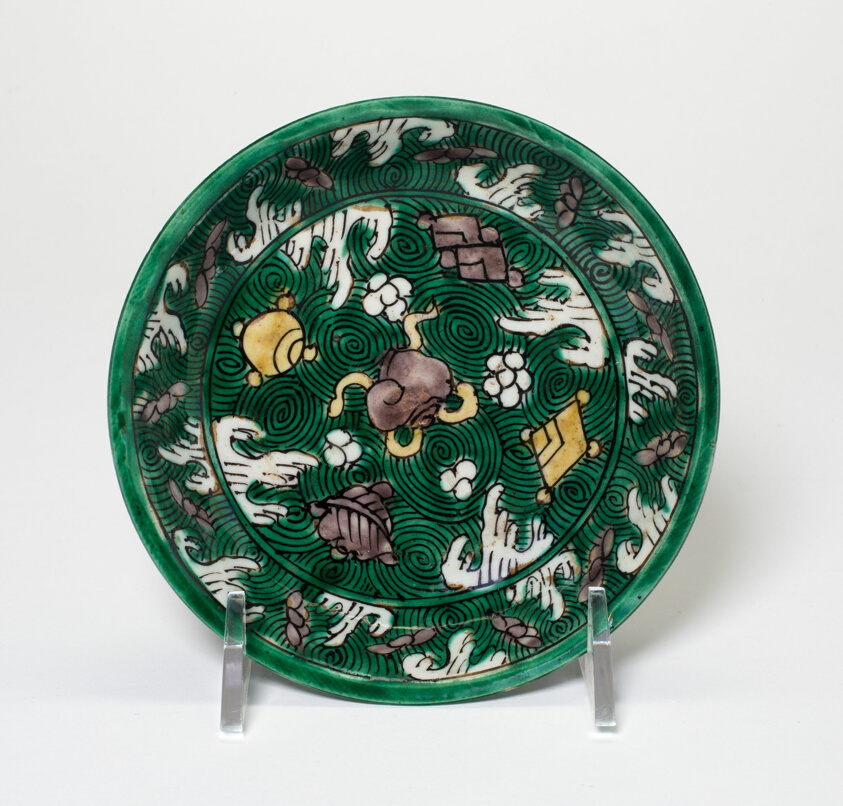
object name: Vessel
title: Saucer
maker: China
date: Qing dynasty (1644–1911), Qianlong period (1736–1795)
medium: Porcelain with green, aubergine, and yellow glazes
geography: China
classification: porcelain; asian art; ceramics